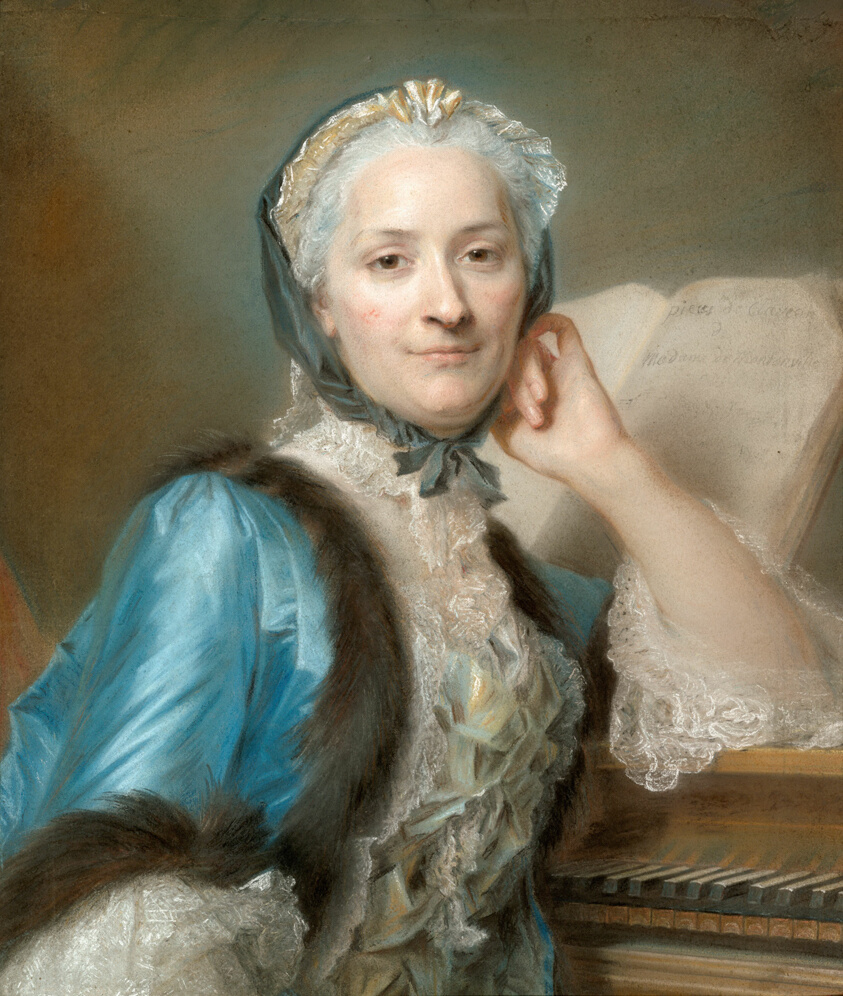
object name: Drawing and Watercolor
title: Portrait of Madame Anne-Jeanne Cassanéa de Mondonville, née Boucon (1708-1780)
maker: Maurice Quentin de Latour (French, 1704-1788)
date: c. 1752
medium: Pastel on blue-gray laid paper, laid down on canvas and wrapped around a strainer, enlarged by the artist with a band of paper about 3 cm high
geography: France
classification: pastel; drawings (visual works); prints and drawing